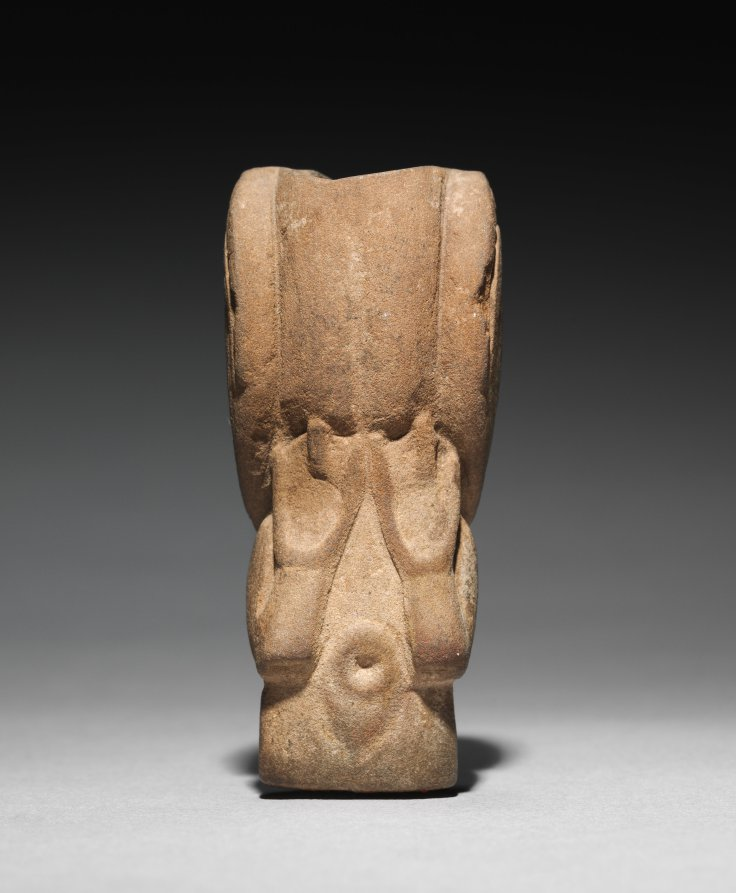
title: Bird Effigy Pipe Fragment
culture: Native North America, Adena people, Vance Mound, Newton Township, Licking County, Ohio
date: 400 BCE–100 CE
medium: sandstone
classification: Sculpture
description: The modest appearance of this small bird-effigy pipe, its head now lost, is misleading—the carving is fine and imagery, complex. The upper part takes the form of a bird’s body, the wings folded over the back. The section beneath the bird’s breast, intact but difficult to read, may depict a human torso with a pronounced navel and upraised forearms and hands, the palms facing outward. If so, one creature could be carrying or transforming into the other. The pipe was created by an artist of the ancient Adena people of southern Ohio. Smoke traveled through an interior channel to the mouthpiece, a small hole on the underside.